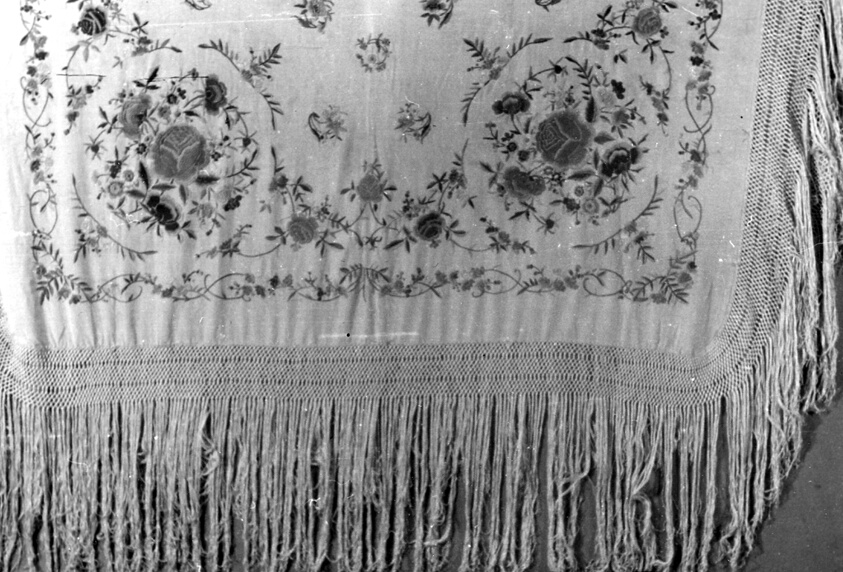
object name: Costume and Accessories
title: Shawl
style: qing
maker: China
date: Qing dynasty (1644–1911), 19th century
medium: Silk, plain weave; embroidered with silk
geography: China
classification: textile; weaving; needlework (visual works); costume; dress (garment); clothing